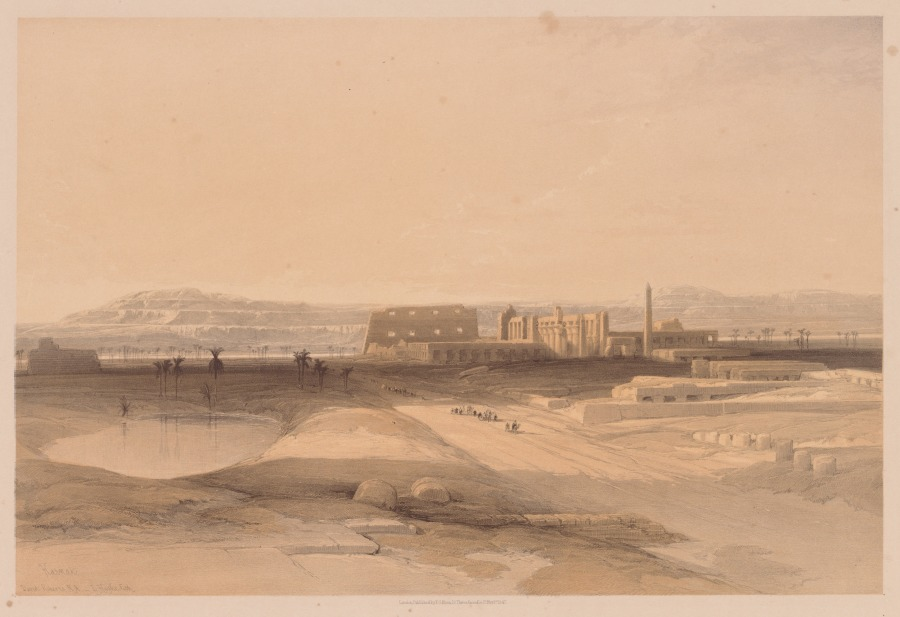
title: Egypt and Nubia: Volume II - No. 32, Karnak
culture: England, 19th century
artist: Louis Haghe (British, 1806–1885)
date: 1838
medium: color lithograph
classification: Print